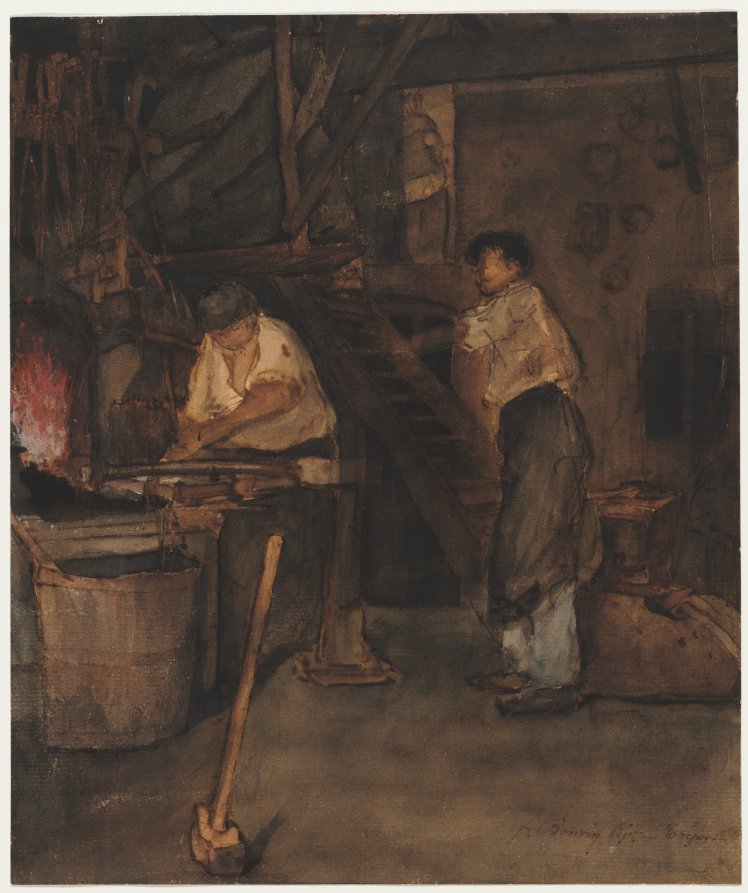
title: Study for The Blacksmith's Shop: Remembrance of Le Tréfort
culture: France, 19th century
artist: François Bonvin (French, 1817–1887)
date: 1854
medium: watercolor with gouache and iron gall ink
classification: Drawing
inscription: Signed and dated lower right, brown ink: F. Bonvin 1854 Tréport Inscribed on the mount, in graphite: Les Forgerons (Toulouse) Inscribed and signed on the mount, in brown ink: À mon trés cher ami Breffant / F. Bonvin 1er août 57